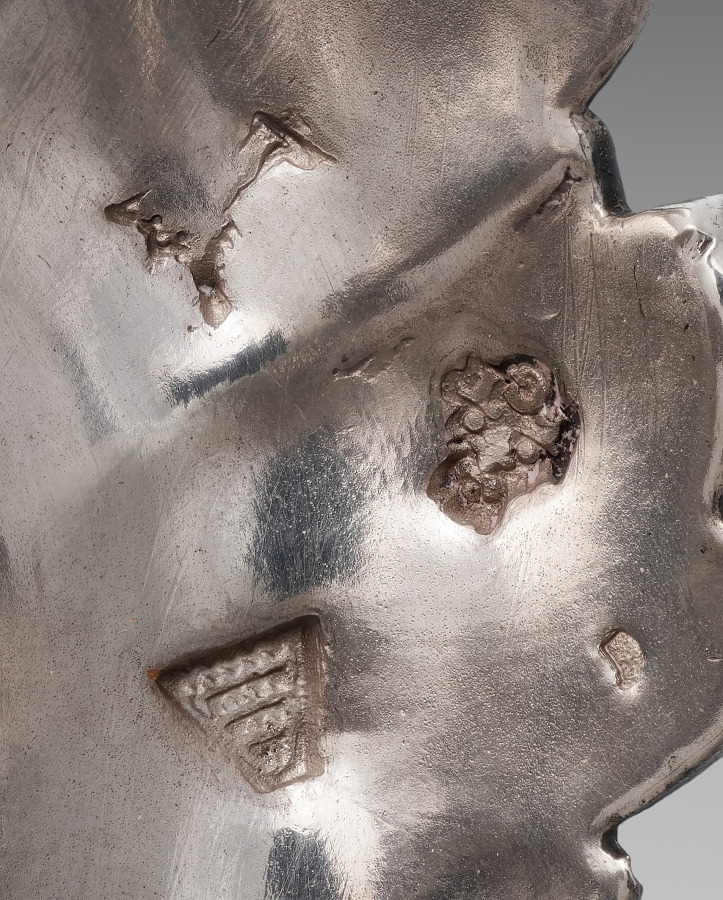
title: Candelabrum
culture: France, Paris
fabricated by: François Thomas Germain (French, 1726–1791)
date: 1757–1758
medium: silver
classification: Silver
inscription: [Maker’s mark of Francois-Thomas Germain, beneath base]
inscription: [Charge mark of Eloy Brichard, 1756−1762, beneath base]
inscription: [Warden's mark For Paris, 1757−1758, beneath base]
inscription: [Discharge mark for work intended for export, 1756−1775, beneath base]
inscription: [Discharge mark for work intended for export, 1756−1775, on base]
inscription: [Hallmarks for Saint Petersburg, on base]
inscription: [Assay mark of Ivan Frolov, on base]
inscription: [Russian standard of the French silver, on base]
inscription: [Maker’s mark of Francois-Thomas Germain, master silversmith on October 16, 1748, beneath drip pan of each three bobeches]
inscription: [Charge Mark Of Eloy Brichard, 1756−1762, beneath drip pan of each three bobeches]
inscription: [Discharge mark for work intended for export, probably 1733−1775, beneath drip pan of each three bobeches]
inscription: [Warden's mark for Paris, 1757-1758, beneath drip pan of each three bobeches]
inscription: [Russian standard of the French silver, beneath drip pan of one of three bobeches]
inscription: [Assay mark of Ivan Frolov, beneath drip pan of one of three bobeches]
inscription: [Charge mark for large work of Eloy Brichard, 1756−1762, on bayonet attachment of candelabra]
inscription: [Warden's mark for Paris, 1757-1758, on bayonet attachment of candelabra]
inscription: [Illegible mark in a square, on one bobeche]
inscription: [Engraved beneath base]: “Fait. Par. F. T. Germain. Sculp[teu]r. Orf[ev]re. Du Roy. Aux. Galleries. Du Louvre. A Paris- 1758”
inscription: [Engraved beneath base]: "Du no. 31"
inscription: [Beneath base]:"No 463"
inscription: [Russian Imperial Coat-of-arms, engraved beneath base]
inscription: [Modern inscription with black ink, beneath base]: "L5 ... 51/w-8"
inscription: [Modern inscription (illegible) in a rectangular paper label on the base, engraved. Cipher composed with two “M”’s (?) surmounted by a royal crown]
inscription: [Engraved on candelabra bayonet attachment]: "No 463"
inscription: [On candelabra bayonet attachment]: "du No 31"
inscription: [Engraved cipher with two "M"s (?) surmounted by a royal crown, on one bobeche]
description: This candelabrum is part of a pair. Its design blurs the line between function and decoration. The arms twist and curve, visually flower stems while physically supporting the candles. Though this visual unity is typical of the rococo style, the influence of the rising neoclassical style is evident in the allegorical scenes of light that decorate each candelabra’s stem.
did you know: These candelabra are part of a dinner service sent from Paris, France to Saint-Petersburg, Russia in two separate shipments, the first of which contained 270 objects for 8 dozen place settings.